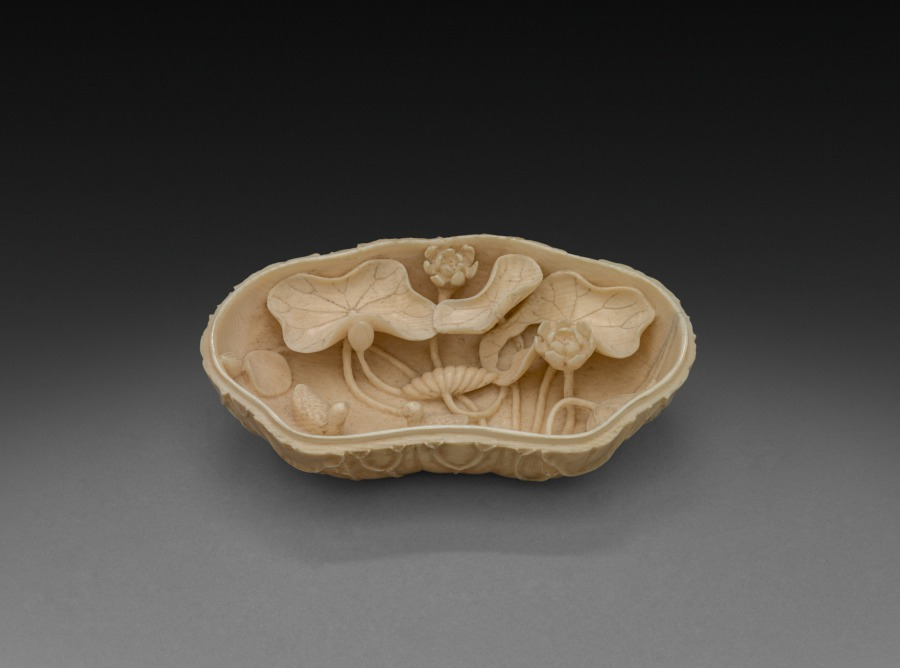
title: Box in Form of Lotus Leaf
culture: China, Qing dynasty (1644-1911)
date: 1700s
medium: ivory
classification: Ivory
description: In the Qing dynasty (1644–1911), luxury items became more affordable to larger parts of the society, including women, merchants, and literati in non-official positions. Imperial patronage and a growing urban population encouraged consumption of luxury goods and local craftmanship. This fine grained, light yellow ivory carved the the shape of a lotus leaf illustrates the superb carving skills and the creative mind of the talented artisan who sought clients on a competitive market.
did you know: Inside each box is a lotus pond and two swimming ducks carved in high relief.